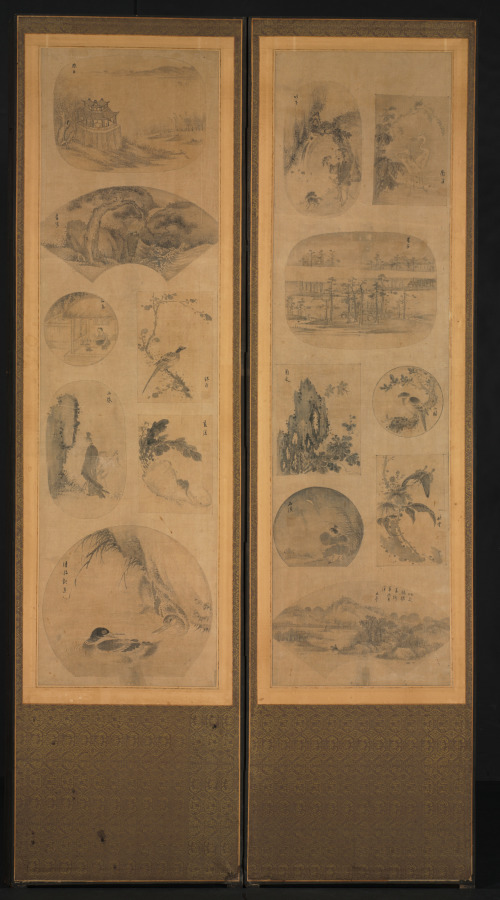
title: Painting of One Hundred Themes (obverse)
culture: Korea, Joseon dynasty (1392–1910)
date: late 1800s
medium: Ten-panel folding screen affixed with album leaves (obverse), calligraphy (reverse), ink and color on silk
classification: Painting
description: This screen depicts paintings on one side and poems on the other—an economical format often used in Korea to allow the viewer to enjoy both sides of one screen. The front features an assortment of bird-and-flower, landscape, and figural paintings executed according to the brush manner of more than 50 artists. A calligrapher has brushed several Chinese poems about the four seasons on the reverse side, among them "Composing in the Daytime of Summer" by Tang poet Liu Zongyuan (773–819) and "Composing when Spring Begins" by Song scholar Zhang Shi (1133–1180).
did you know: Depicting small images of various subjects became one of the most popular types of painting toward the end of the 19th century.